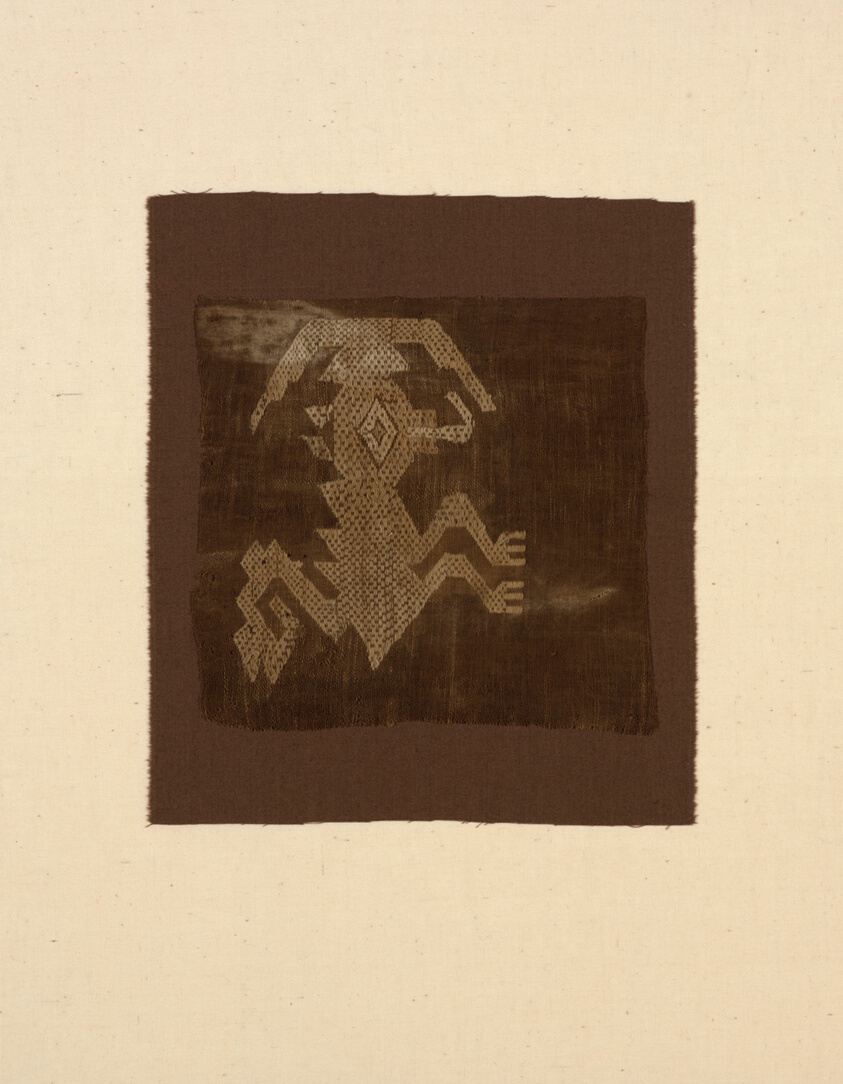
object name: Textile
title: Fragment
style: chancay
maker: Possibly Chancay; Probably central coast, Peru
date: A.D. 1000/1476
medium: Cotton, plain weave with brocading wefts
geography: Peru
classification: textile; weaving